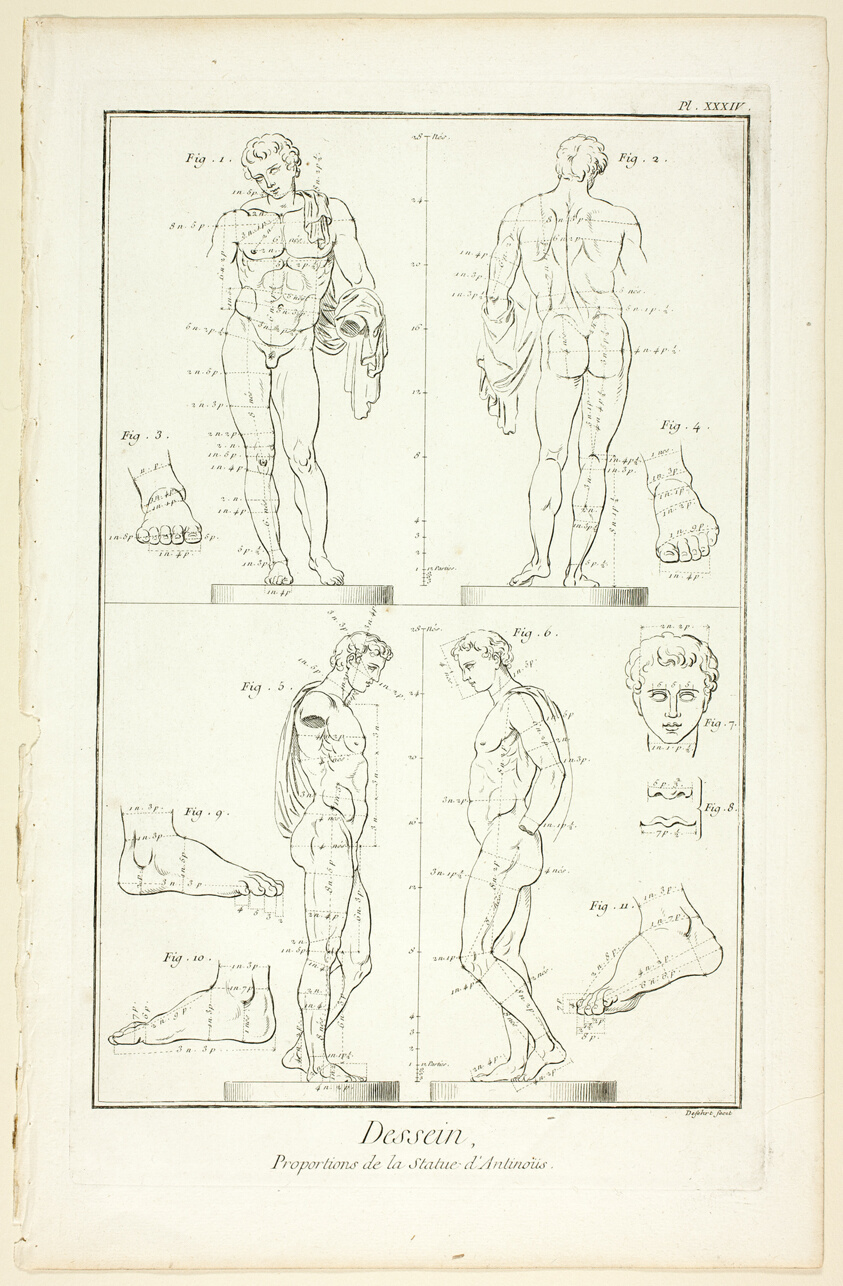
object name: Print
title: Design: Proportions of the Antinoüs Statue, from Encyclopédie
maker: A. J. Defehrt (French, active 18th century); published by André le Breton (French, 1708-1779), Michel-Antoine David (French, c. 1707-1769), Laurent Durand (French, 1712-1763), and Antoine-Claude Briasson (French, 1700-1775)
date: 1762/77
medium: Etching, with engraving, on cream laid paper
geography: France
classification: etching; print; prints and drawing